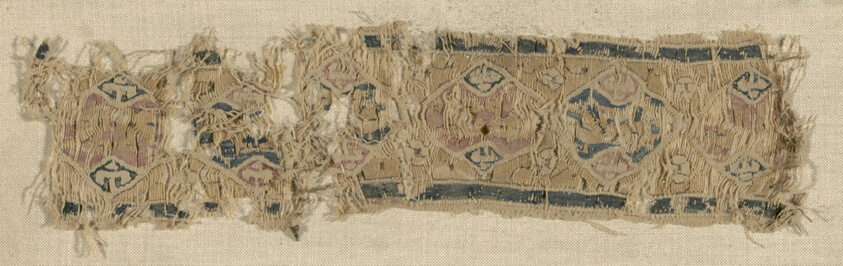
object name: Textile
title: Border Fragment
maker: Egypt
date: Fatimid period (969–1171)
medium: Linen and silk, tapestry weave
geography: Egypt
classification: textile; weaving